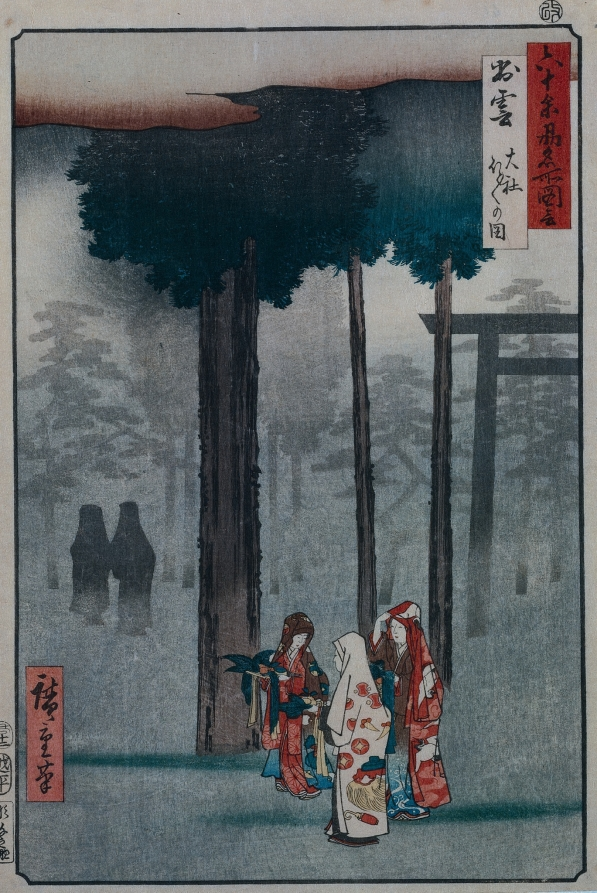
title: Hotohoto Festival at Izumo Grand Shrine, from the series Views of Famous Places in the Sixty-odd Provinces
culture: Japan, Edo period (1615–1868)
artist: Utagawa Hiroshige (Japanese, 1797–1858)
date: 1853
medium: Color woodblock print, ink and color on paper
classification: Print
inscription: Signature: Hiroshige hitsu. Publisher: Echimuraya Heisuke (Echihei). Engraver: Hori Sennosuke. Censorship Seal: aratame.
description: Izumo Shrine is a Shinto shrine on Honshu Island. The Japanese believe that Shinto kami (divine spirits) leave their own shrines for a month in October or November—depending on the lunar calendar—and travel to Izumo Shrine. During this time, a festival is held in which celebrants carrying lighted torches lead the kami to the shrine.